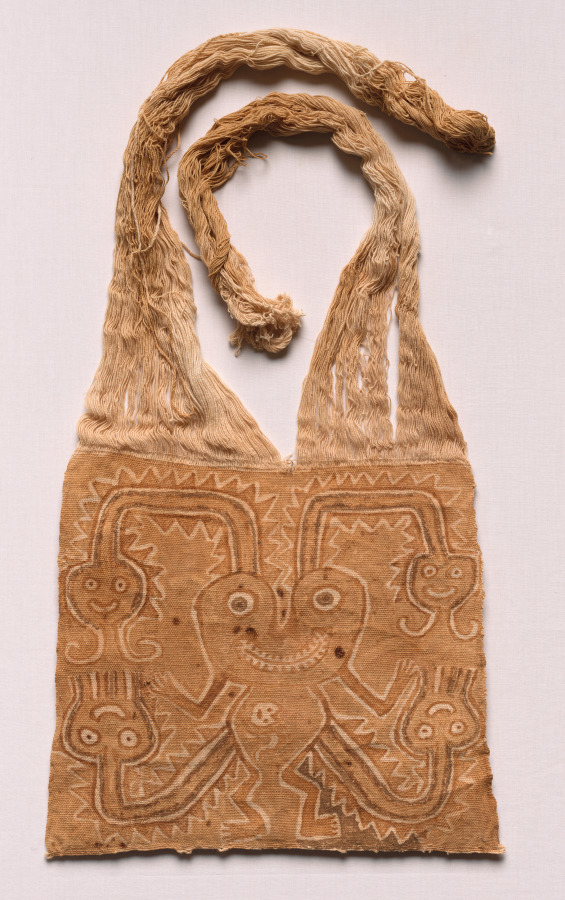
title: Mummy Bundle "Mask"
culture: Peru, South Coast, Ica Valley, Ocucaje site, Paracas style (700 BCE–1 CE)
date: 400–200 BCE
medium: cotton and pigment, plain weave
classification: Textile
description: The Paracas people buried their dead in bundles that they created by carefully wrapping the seated human body in layers of garments and other textiles. In some cases, they placed a painted cloth—such as these examples—on the outer layer and at the top of the bundle. The hair-like yarns (unwoven warps) were arranged around a solid cotton disk that was sometimes wrapped with a headband. The cloths, then, seem to have functioned as the bundle’s head, even though some are painted not with faces but with complete figures whose supernatural character is marked by the appendages streaming from their bodies.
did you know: These masks fall into two categories, those with only a face and those with a full-bodied figure.